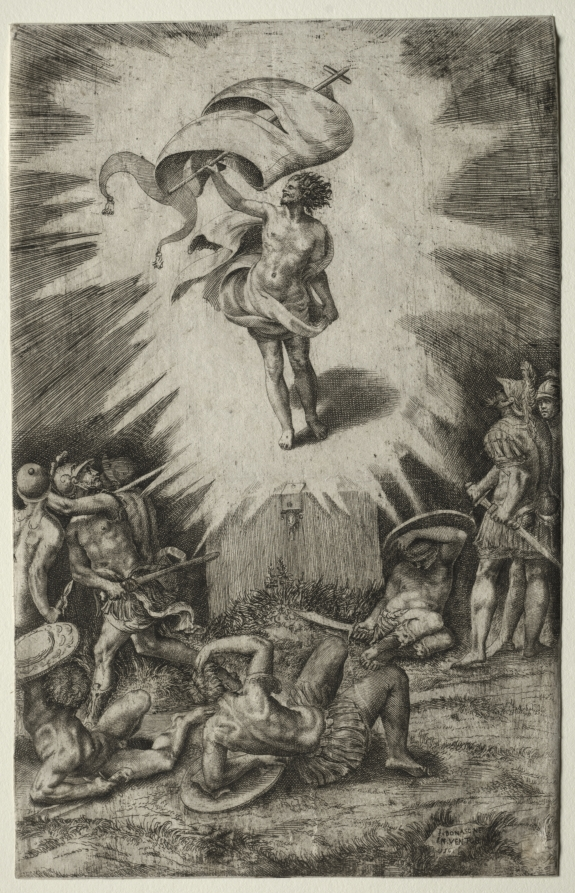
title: The Resurrection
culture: Italy, 16th century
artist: Giulio Bonasone (Italian, c. 1510–after 1576)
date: 1561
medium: etching and engraving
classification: Print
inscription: lower right, in plate: I. BONASONE / INVENTOR / 1561 ; VERSO, by Pierre Mariette, lower left, in pen and brown ink: P. mariette 1696 ; lower right, in graphite: N° 45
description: Chiefly a reproductive printmaker, he made about 360 prints after the leading Italian artists of the period, including Parmigianino, Giulio Romano, and Titian. One of the few prints designed and executed by Bonasone, this is an exceptional work. Its innovative use of etching to achieve dramatic tonal effects probably results from Parmigianino's influence.